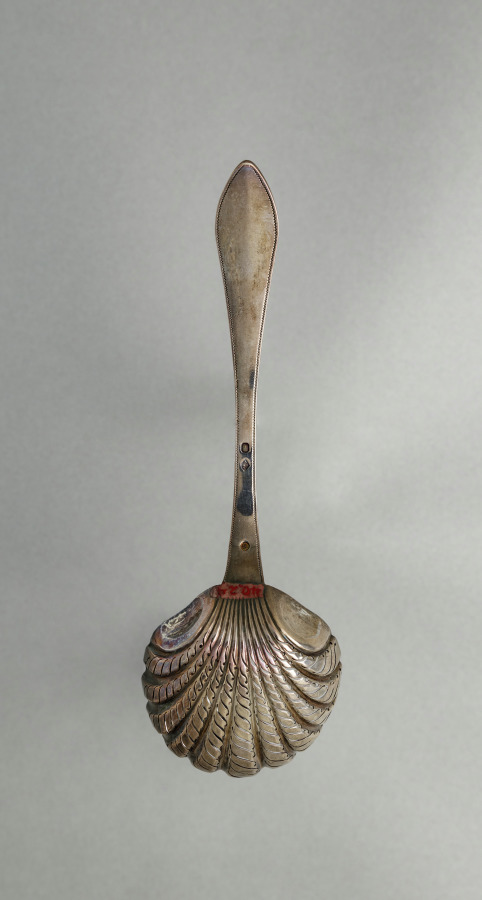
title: Sugar Spoon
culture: France, 19th century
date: 1819–1838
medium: silver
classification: Silver